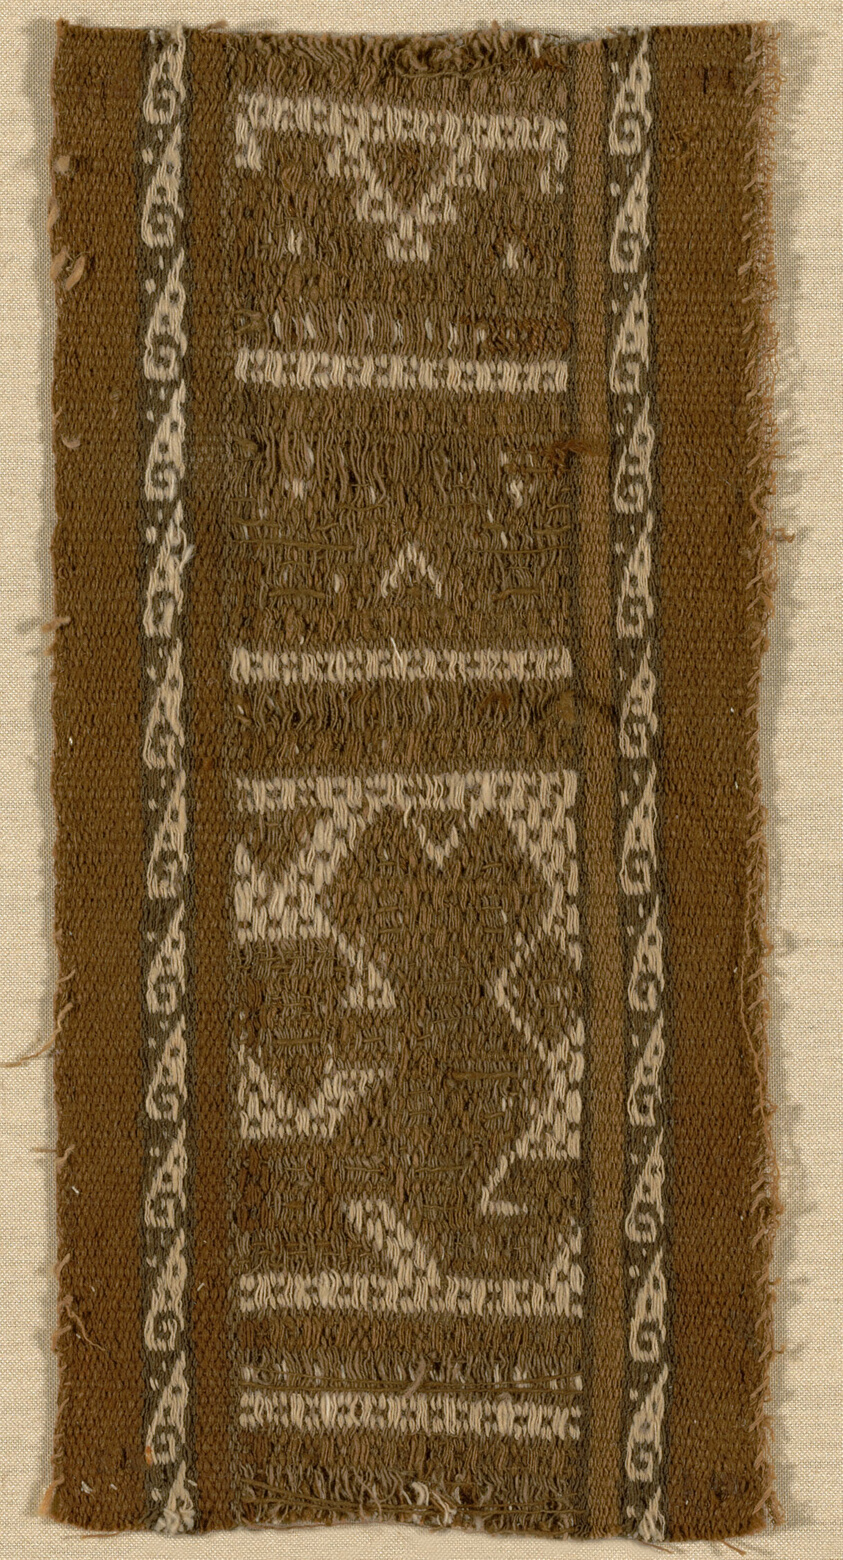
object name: Textile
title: Fragment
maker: Probably central coast, Peru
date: A.D. 1000/1476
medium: Plain brocaded simple cloth or plain compound cloth (?)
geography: Peru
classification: textile; weaving